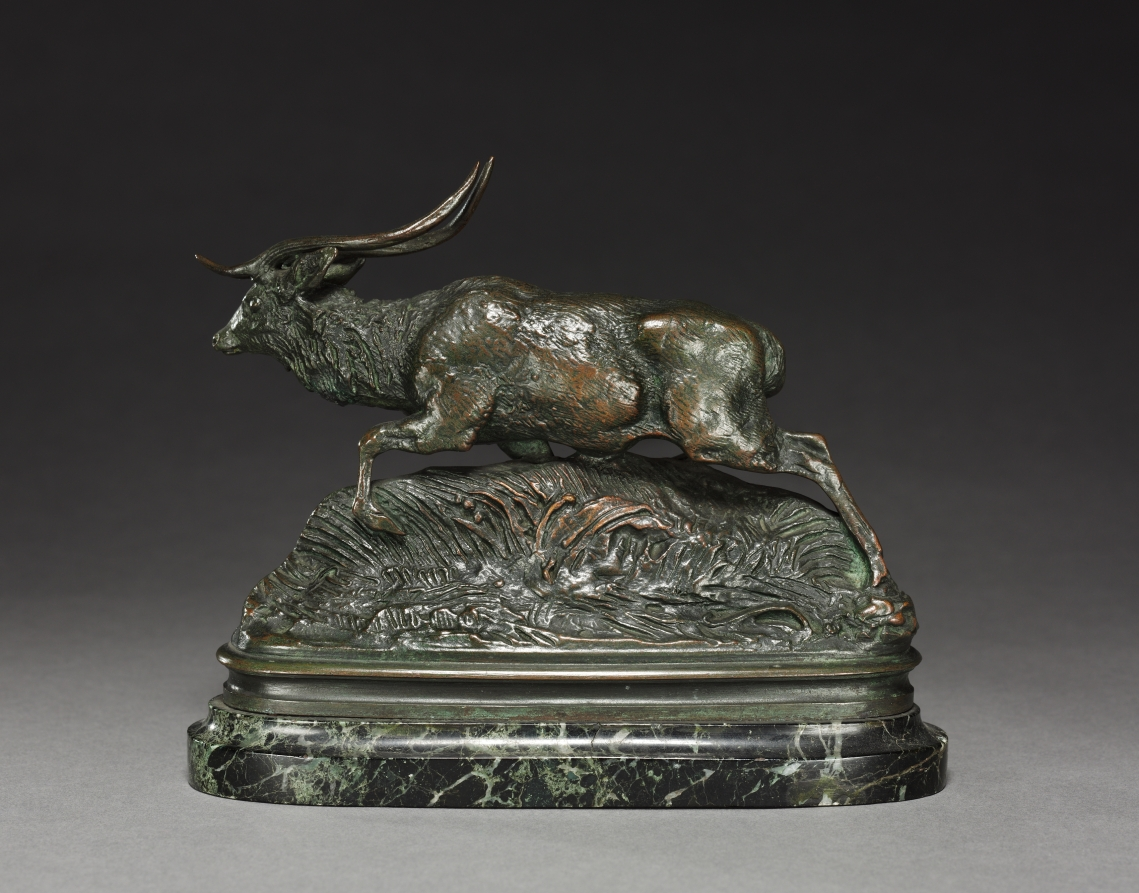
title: Axis Deer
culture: France, 19th century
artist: Antoine-Louis Barye (French, 1796–1875)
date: 19th century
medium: bronze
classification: Sculpture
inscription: Signed: "Barye"; faintly inscribed in small letters: "BARYE 21"